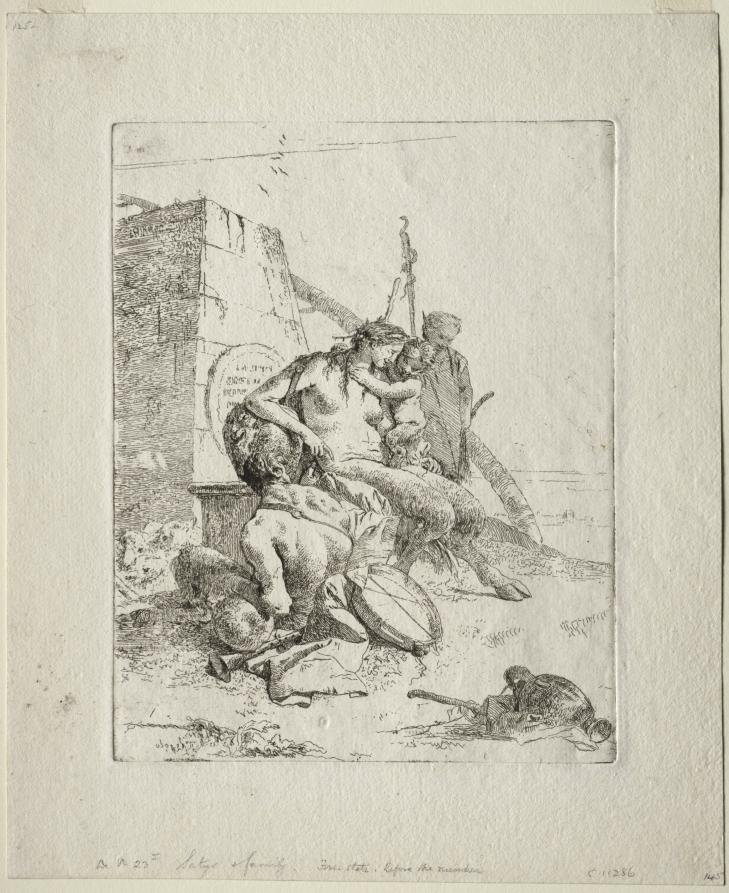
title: Scherzi di Fantasia: Satyr Family with the Obelisk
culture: Italy, 18th century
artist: Giovanni Battista Tiepolo (Italian, 1696–1770)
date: 1750–60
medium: etching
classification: Print